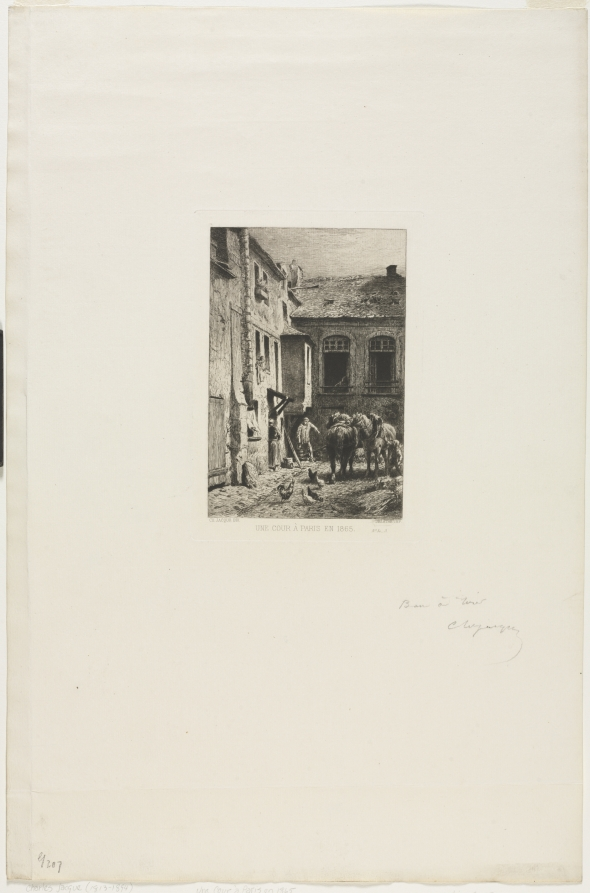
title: A Courtyard in Paris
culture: France, 19th century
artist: Charles-Émile Jacque (French, 1813–1894)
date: 1865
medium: etching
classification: Print